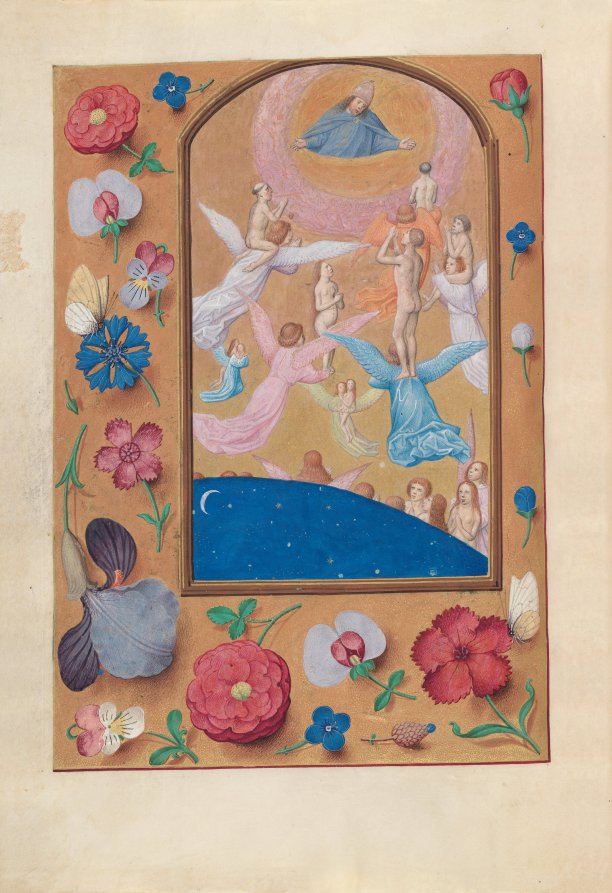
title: Hours of Queen Isabella the Catholic, Queen of Spain: Fol. 24v, Souls of the Saved Brought to Heaven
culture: Flanders, Ghent and Bruges, late 15th century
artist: Master of the First Prayerbook of Maximillian (Flemish, c. 1444–1519)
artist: and Associates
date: c. 1500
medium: ink, tempera, and gold on vellum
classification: Bound Volume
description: A great lover of Flemish art, Queen Isabella treasured her many devotional books. This deluxe manuscript was created for her private devotions by highly organized and distinctly talented manuscript painters active in Ghent and Bruges. The Ghent-Bruges school represents the culmination of Flemish book painting, whose main features were the use of rich colors, illusionistic effects, a love of landscape, and a strong sense of visual narrative. Manuscripts produced by this circle of artists are renowned for their border decoration featuring a rich variety of realistically painted flowers, scrolling acanthus leaves, birds, and butterflies.